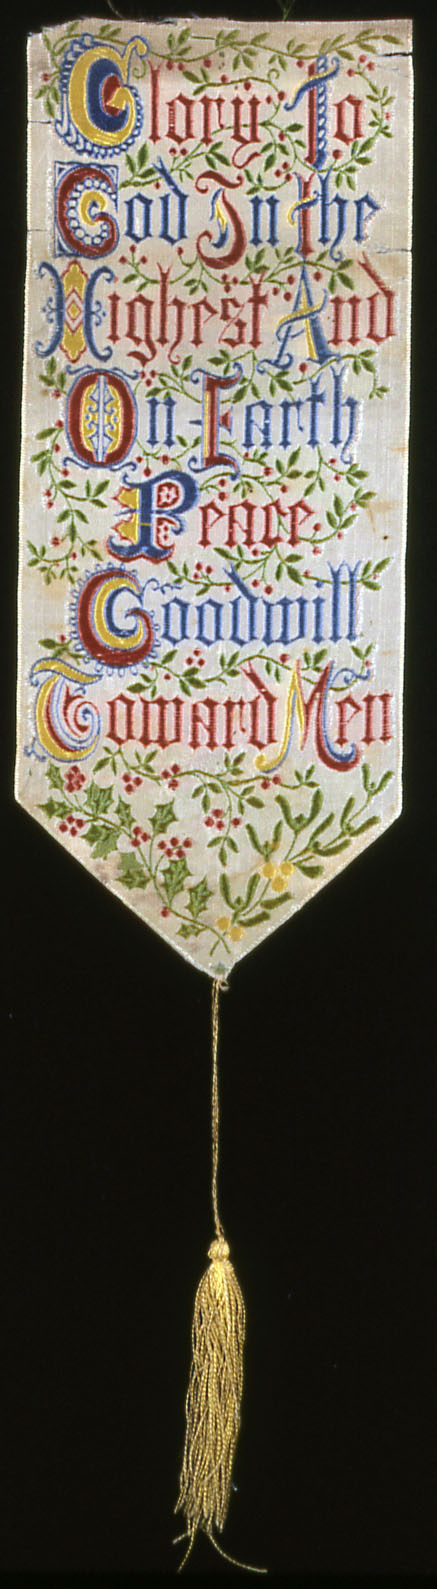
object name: Textile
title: Commemorative Ribbon "Glory to God in the Highest"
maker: Woven by Thomas Stevens (English, 1828–88); Coventry, England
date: 19th century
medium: Silk, plain weave with supplementary brocading wefts with knotted tassel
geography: Coventry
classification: textile; weaving